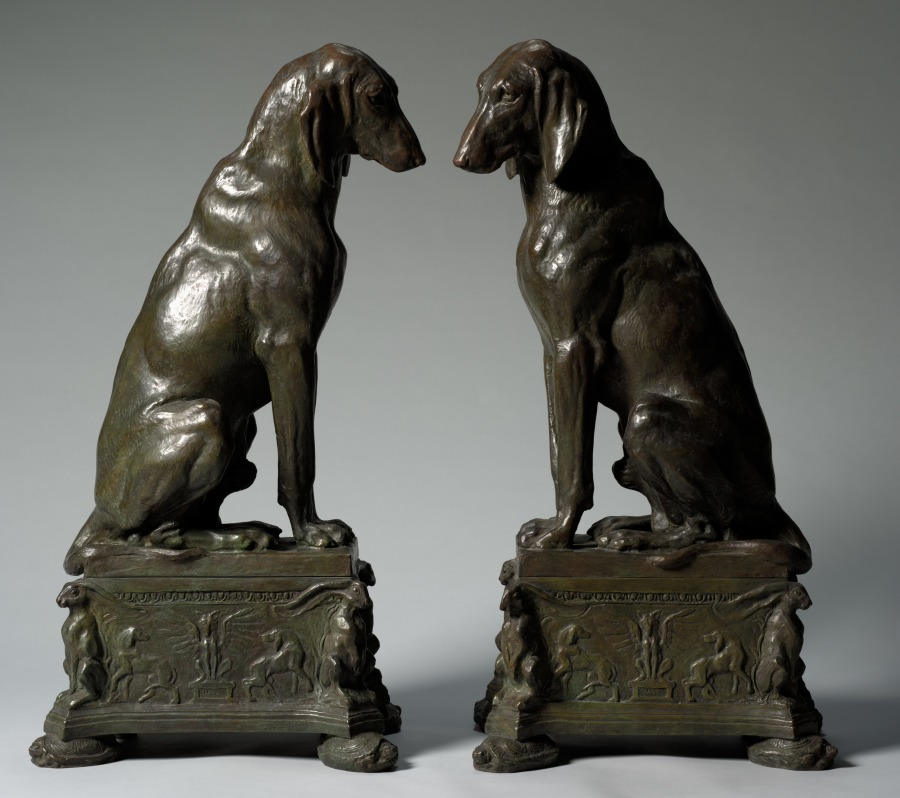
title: Pair of Hounds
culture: America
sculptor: Charles Cary Rumsey (American, 1879–1922)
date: 1912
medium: bronze andirons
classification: Sculpture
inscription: Signed on plinth: © C. C. Rumsey